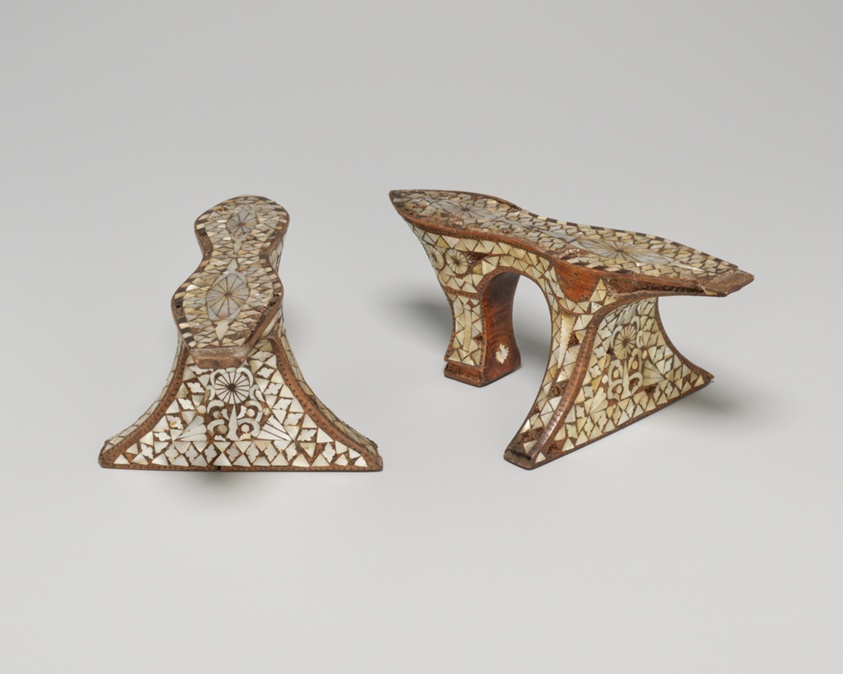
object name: Textile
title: Pair of Clogs (Qabqab)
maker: Algeria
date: Mid–19th century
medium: Wood inlaid with mother of pearl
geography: Algeria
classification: textile; costume accessory - shoe; shoes - misc; costume; dress (garment); clothing